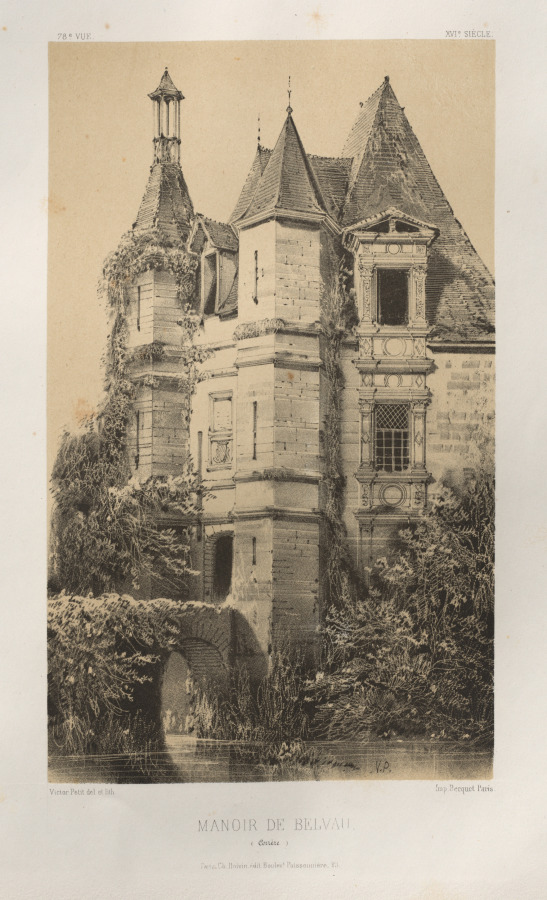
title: Architecture Pittoresque ou Monuments des XVeme. Et XVIeme. Siecles: Chateaux de France des XV et XVI Siecles: Pl. 78, Manoir de Belvau (Corrèze)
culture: France, 19th century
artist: Victor Petit (French, 1817–1874)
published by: Charles Boivin (publisher and editor); Lith de Godard a Paris (printer)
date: 1860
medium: lithograph with tint stone, from portfolio of 100 lithographs with tint stone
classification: Print